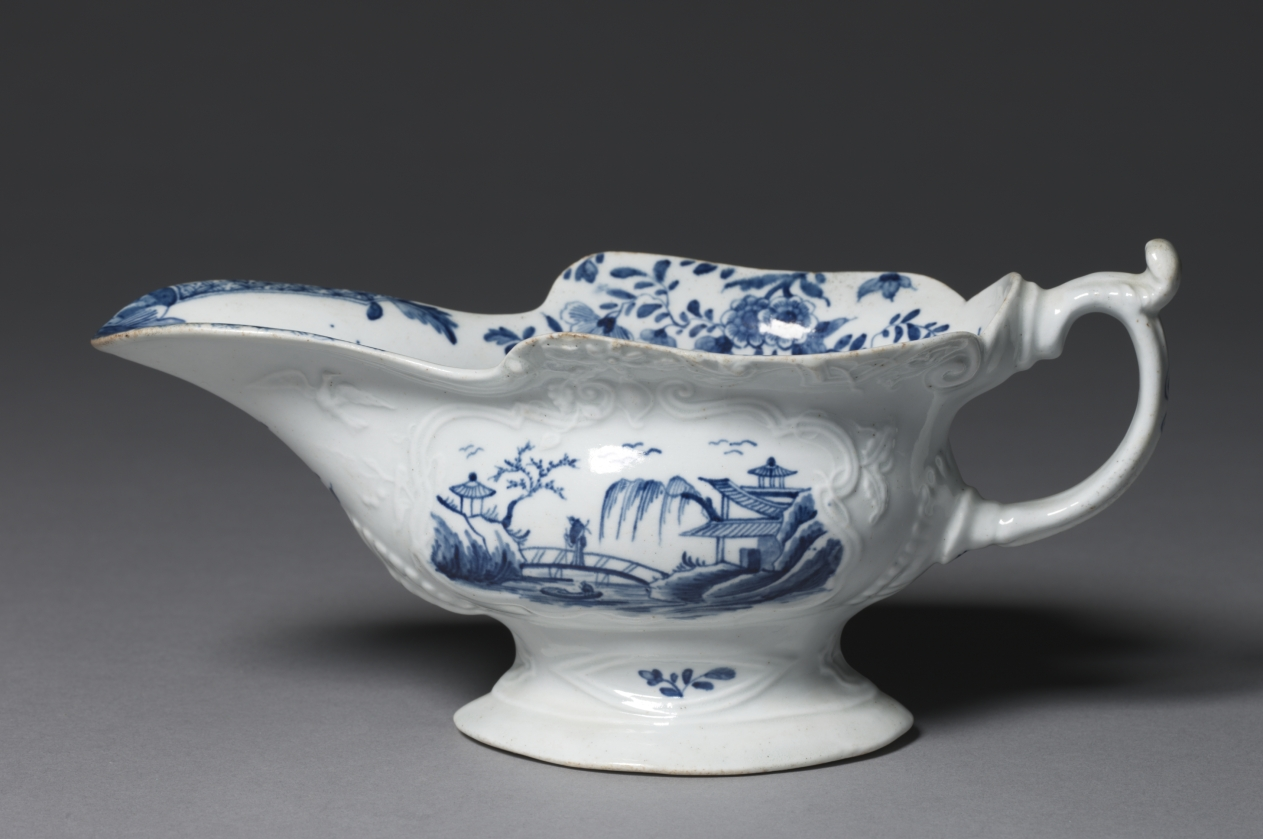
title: Sauce Boat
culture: England, 18th century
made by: possibly by Bristol Porcelain Factory (British, 1770–82)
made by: possibly by Worcester Porcelain Factory (British, established 1751)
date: c. 1752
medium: porcelain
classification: Ceramic